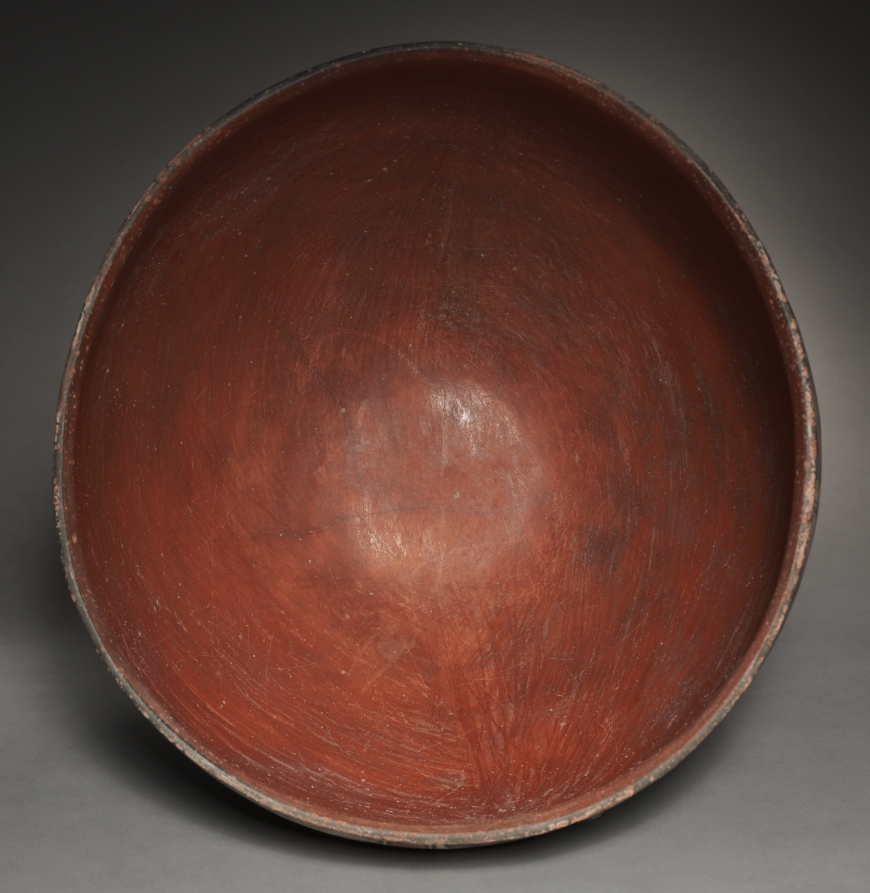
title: Dough Bowl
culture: Southwest,Pueblo, Zia, Post-Contact Period,19th century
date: 1890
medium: ceramic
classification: Ceramic